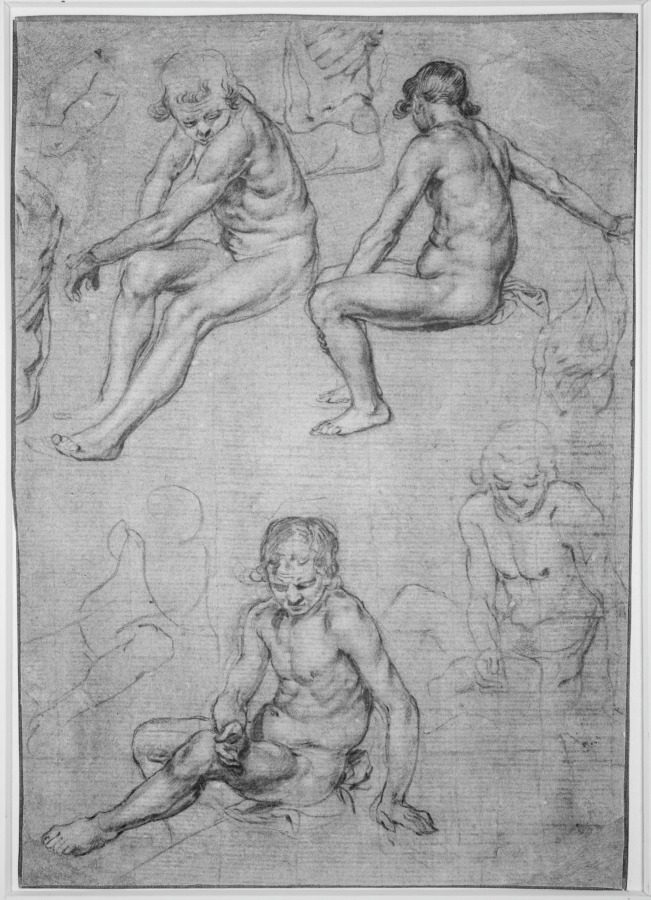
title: Studies of a Naked Seated Boy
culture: Netherlands, 16th - 17th century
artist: Jacob de Gheyn II (Netherlandish, 1565–1629)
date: c. 1603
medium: Black chalk and white chalks with stumping on gray-blue antique laid paper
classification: Drawing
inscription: in graphite, verso: “24” and “376/” and “Helmont”?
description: This sheet of studies of a young male model drawn from various angles is among the earliest nudes drawn from life in the Netherlands. The artist Jacques de Gheyn carefully observed the boy’s body and poses, concentrating on the modeling of his skin and muscles through light and shadow rendered with a combination of black and white chalks on gray-blue paper. The directness of this study was unusual in the Northern Netherlands around 1600, where the vogue for mythological scenes inspired human bodies that were more artificial than natural.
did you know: This sheet of studies of a young male model drawn from various angles is among the earliest nudes drawn from life in the Netherlands.